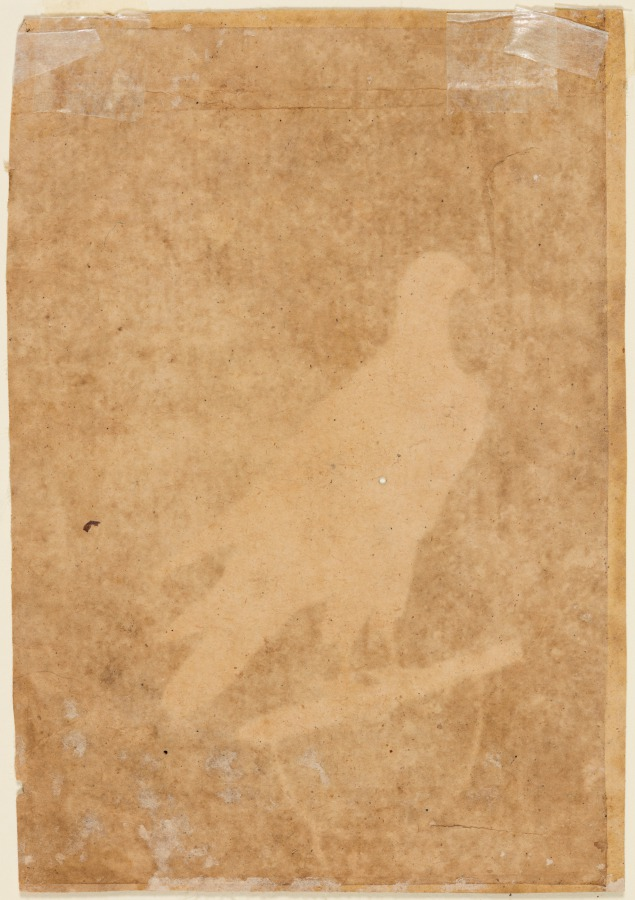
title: Falcon on a Perch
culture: Northwestern India, Rajasthan, Rajput Kingdom of Amber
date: c. 1610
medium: gum tempera on paper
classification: Painting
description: Falcons were prized participants in royal hunting expeditions, and this painting may be a portrait of a favorite bird or a gift from an ally. The bird faces left, and the talons are tied to the perch with a black string. The light green background, flowering trees, and plants provide dynamism to the composition and reveal the artist’s awareness of Persian, Mughal, or Deccani styles of painting.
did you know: A thin coat of malachite was applied for the background.